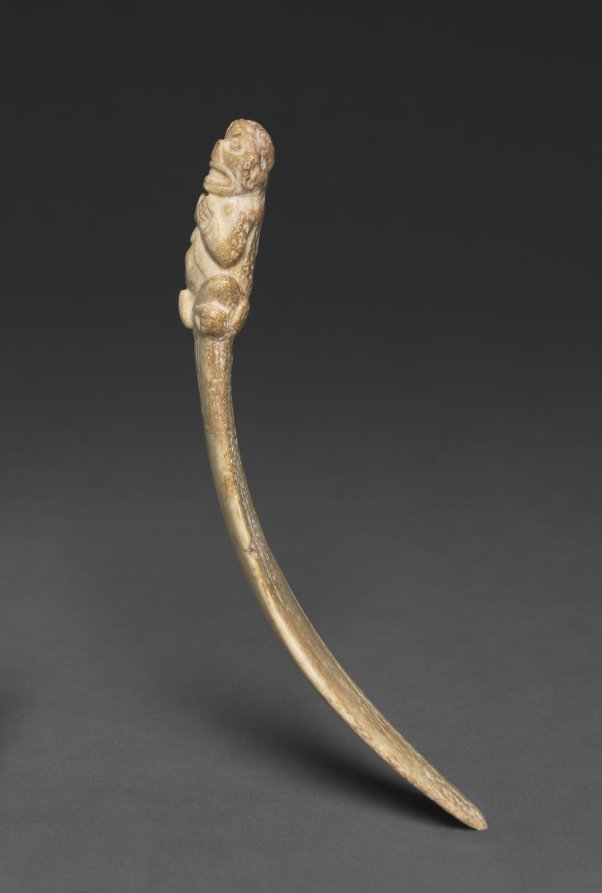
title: Spatula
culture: Caribbean, Greater Antilles, Taino, 10th-15th century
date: 900–1492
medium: manatee bone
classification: Sculpture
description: In 1492, when Christopher Columbus sailed into the Caribbean, the islands of Cuba, Hispaniola (Haiti and the Dominican Republic), Jamaica and Puerto Rico were inhabited by the Taino people. Taino religious ceremonies often included the snuffing of hallucinogenic herbs to alter the consciousness and facilitate contact with the spirit world. Carved spatulas were used to blend the powdered herbs. After purifying the body through purging the stomach, the snuff was inhaled into both nostrils.